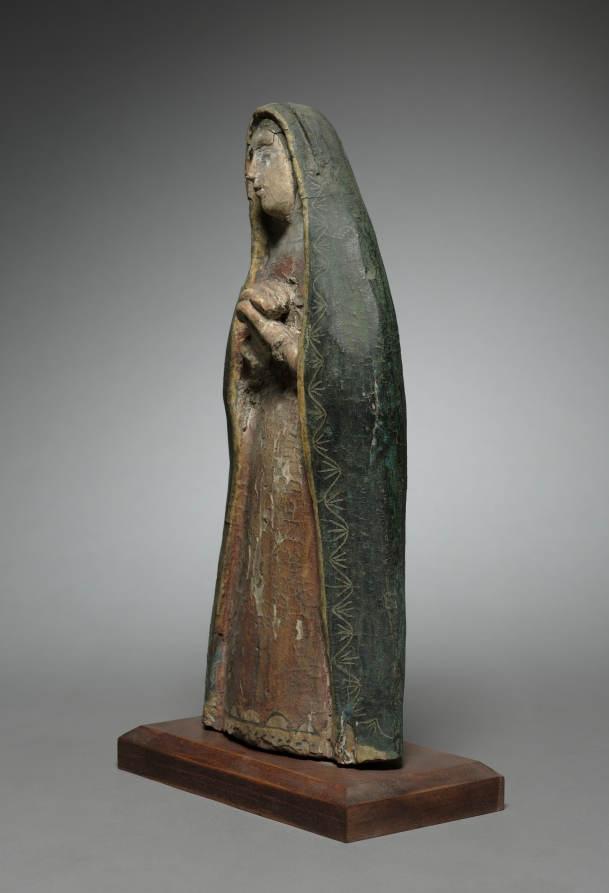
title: Our Lady of Sorrows: santo de bulto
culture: America, New Mexico, 17th-18th century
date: 1600s-1700s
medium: painted wood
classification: Sculpture